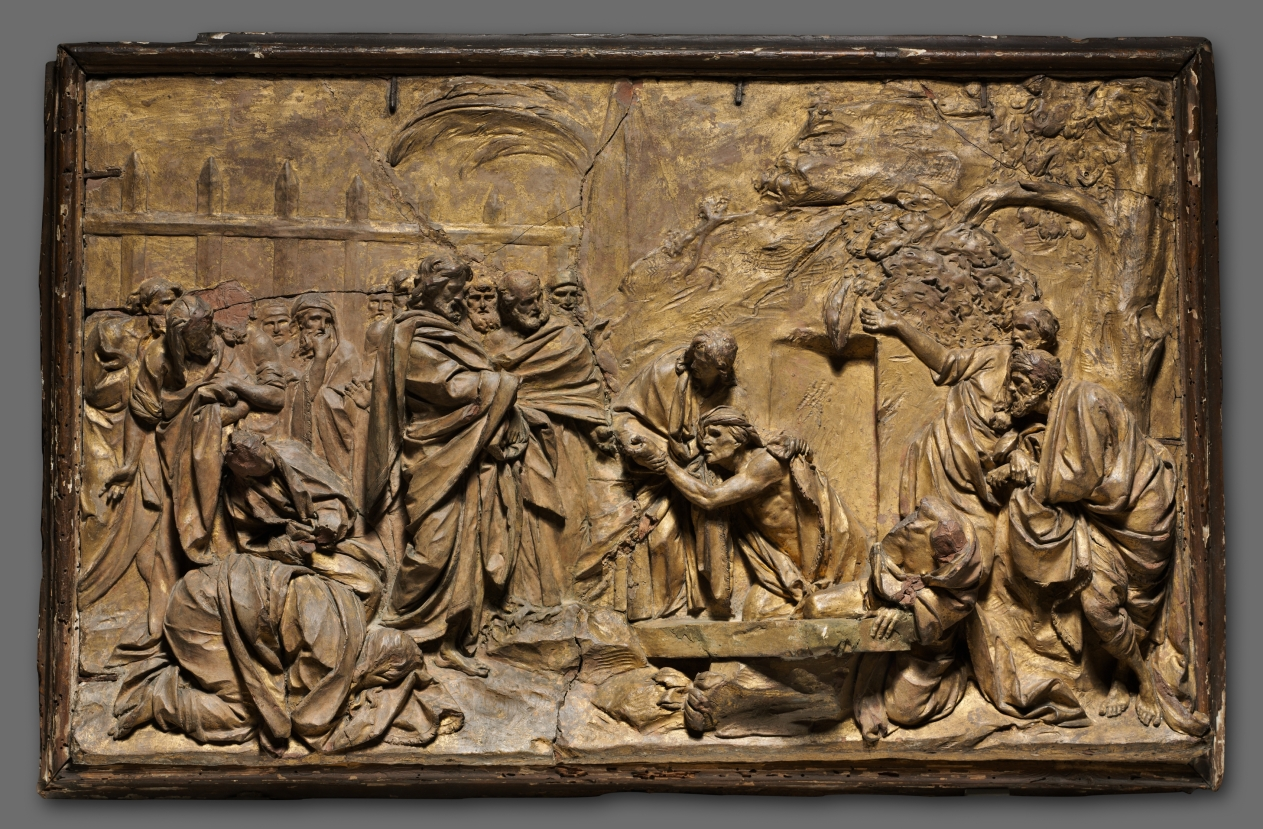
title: The Raising of Lazarus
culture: Italy, Rome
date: c. 1725–50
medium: gilded terracotta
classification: Sculpture